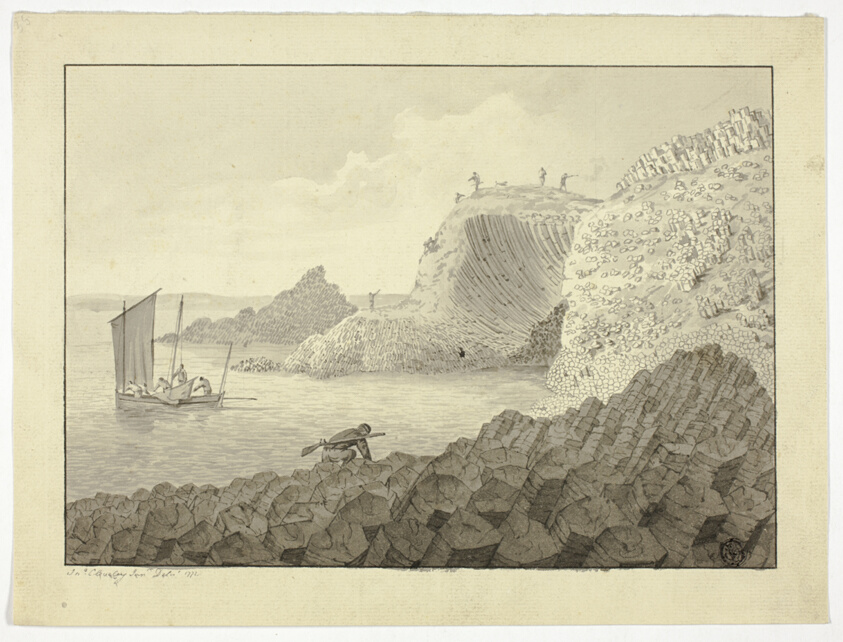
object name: Drawing and Watercolor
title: Giant's Causeway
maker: John Clevely, II (English, 1747-1786)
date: 1772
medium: Pen and black ink and brush and gray wash over traces of graphite, on cream laid paper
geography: England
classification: ink or chalk wash; drawings (visual works); prints and drawing